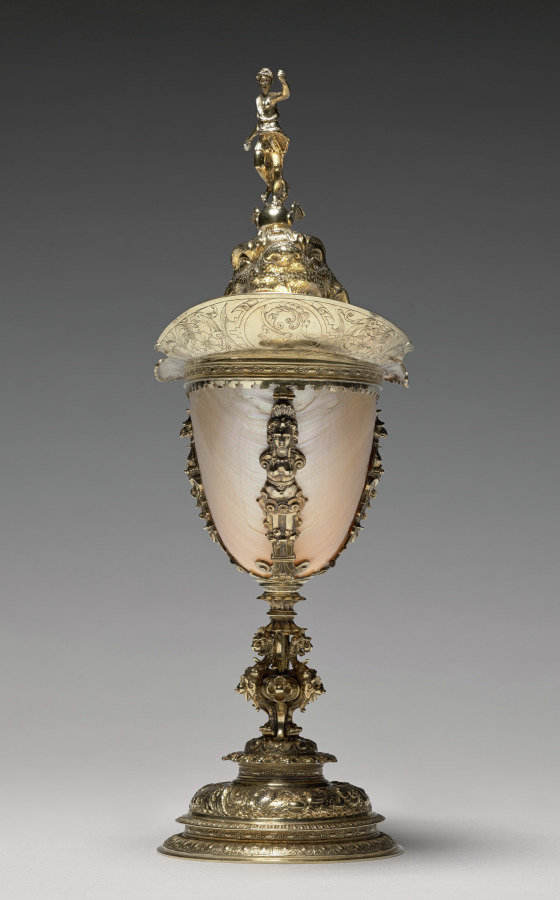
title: Nautilus Cup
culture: Netherlands, Holland, Delft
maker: Cornelis Jansz van der Burch (Dutch, active in Delft, d. 1615)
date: 1607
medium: Silver-gilt, nautilus shell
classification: Metalwork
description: Nautilus shells were brought to the Netherlands from Indonesia. Skilled Dutch silversmiths mounted them in silver, creating luxurious vessels that were sought after by wealthy collectors. Early Dutch nautilus cups are mainly associated with the city of Delft, although only a few other examples made in Delft are known from the late sixteenth and early seventeenth centuries. They feature the dramatic motif of a sea monster’s head.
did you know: The nautilus is a marine mollusk that swims by expelling water from its shell using jet propulsion.